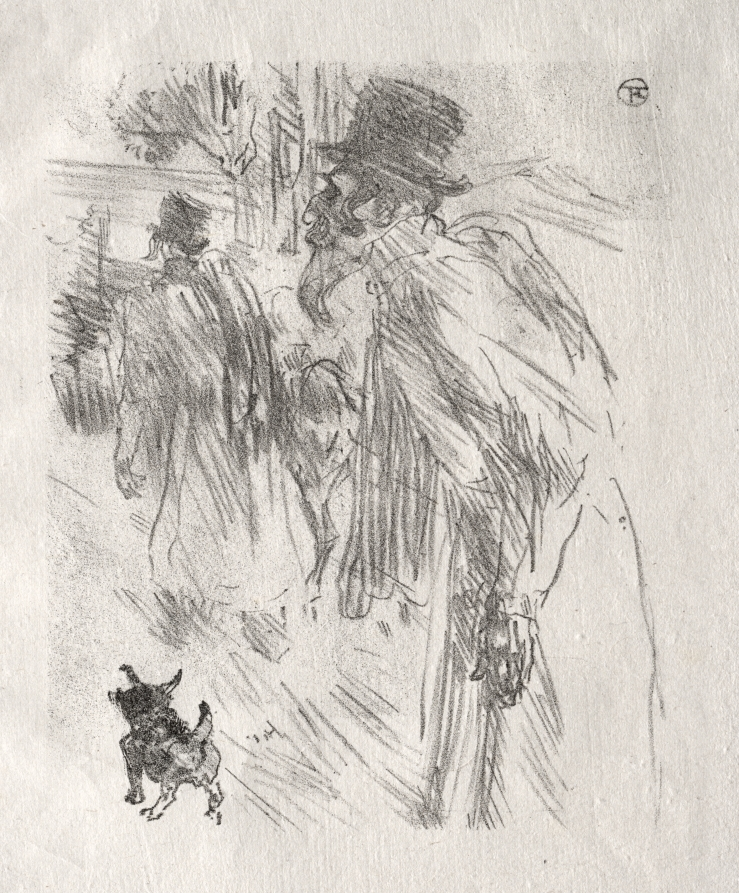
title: Au pied du Sinaï: Les Juifs Polonais, Carlsbad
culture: France, 19th century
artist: Henri de Toulouse-Lautrec (French, 1864–1901)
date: 1898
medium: lithograph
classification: Print